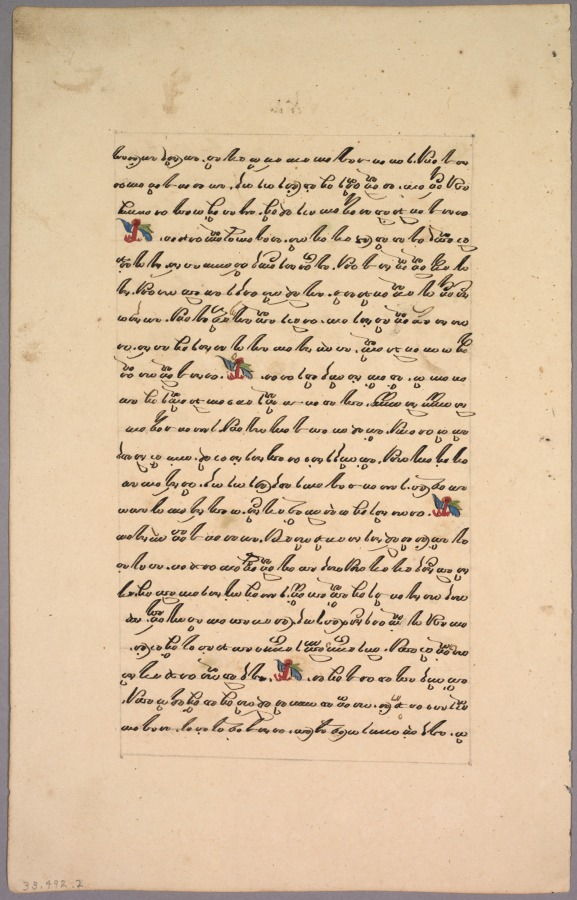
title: Page from Ramayana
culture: Java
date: 1800s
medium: ink on paper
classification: Manuscript